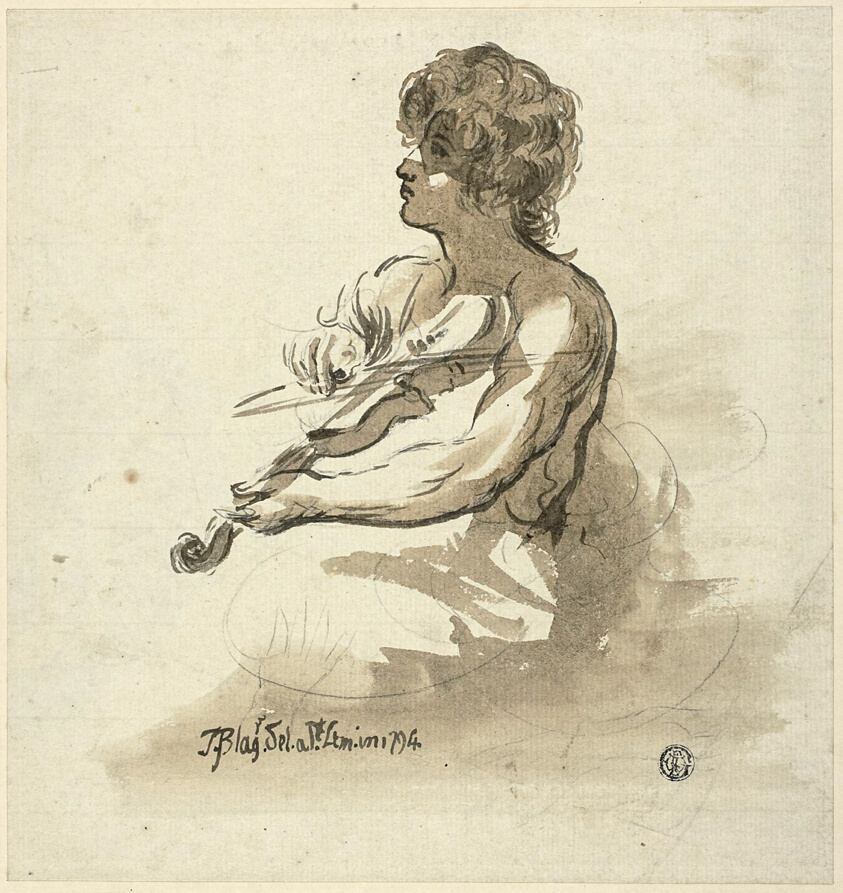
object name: Drawing and Watercolor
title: Young Violinist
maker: Unknown English artist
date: 1794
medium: Brush and brown wash over graphite, on ivory laid paper, laid down on cream wove card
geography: England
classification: ink or chalk wash; drawings (visual works); prints and drawing